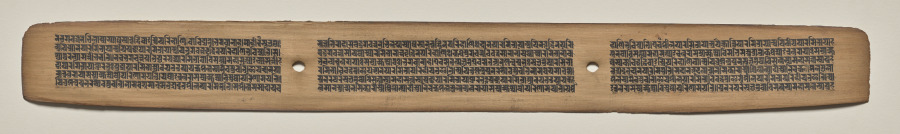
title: Text, Folio 123 (recto), from a Manuscript of the Perfection of Wisdom in Eight Thousand Lines (Ashtasahasrika Prajnaparamita-sutra)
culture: Eastern India, Bihar, Vikramashila Monastery. Painting: Nepal, Kathmandu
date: Sunday, September 14, 1119 (year 239 of the Newar Samvat in the month of Ashvina)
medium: gum tempera and ink on palm leaves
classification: Painting